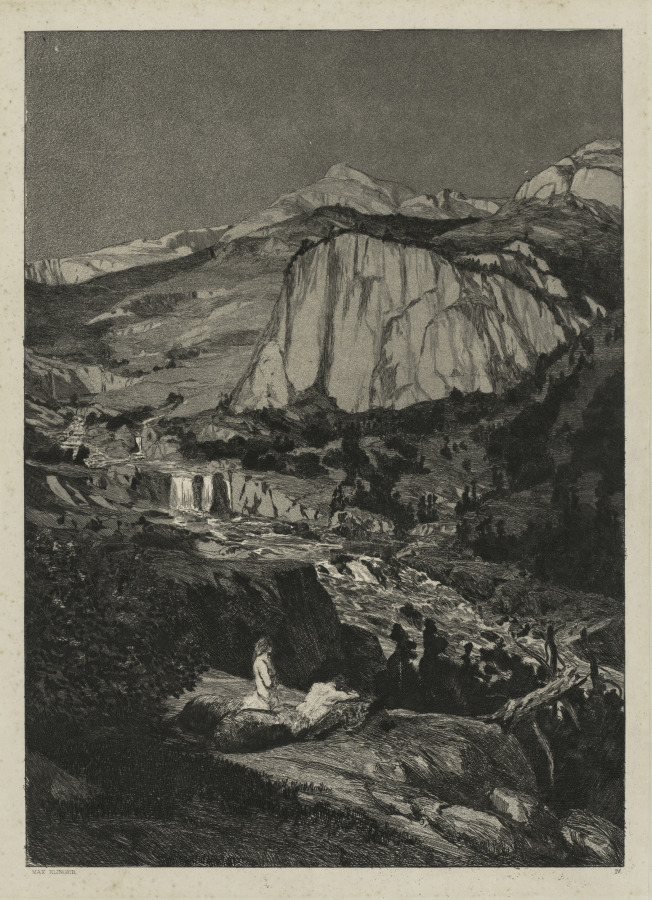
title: Intermezzo: Moonlit Night (Opus IV, 5)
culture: Germany, 20th century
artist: Max Klinger (German, 1857–1920)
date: 1881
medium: etching and aquatint on chine collé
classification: Print